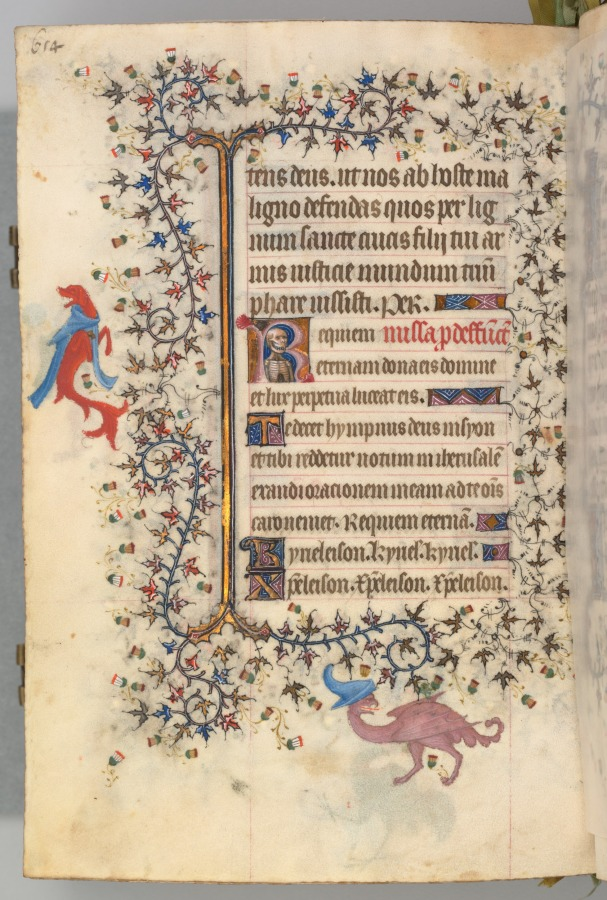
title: Hours of Charles the Noble, King of Navarre (1361-1425), fol. 321v, Bust of Death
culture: France, Paris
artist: Master of the Brussels Initials and Associates (French)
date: c. 1405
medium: ink, tempera, and gold on vellum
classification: Bound Volume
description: This precious volume was obviously highly prized by its owner, the French-born King of Navarre, who had his coat of arms painted on no less than twenty folios. Rather than directly commissioning this manuscript from a specific workshop, it seems that Charles the Noble acquired his book of hours -- perhaps ready-made for the luxury market -- while on a trip to Paris in 1404-05. A collaborative effort, six painting styles are evidenced within the pages of this codex, those of two Italians, two Frenchmen, and two Netherlanders. The painter who was responsible for the planning and decoration of the book, and who produced seventeen of the large miniatures, was a Bolognese artist known as the Master of the Brussels Initials. His principal assistant, responsible for most of the borders, was a Florentine who signed his name "Zecho" da Firenze on folio 208 verso.